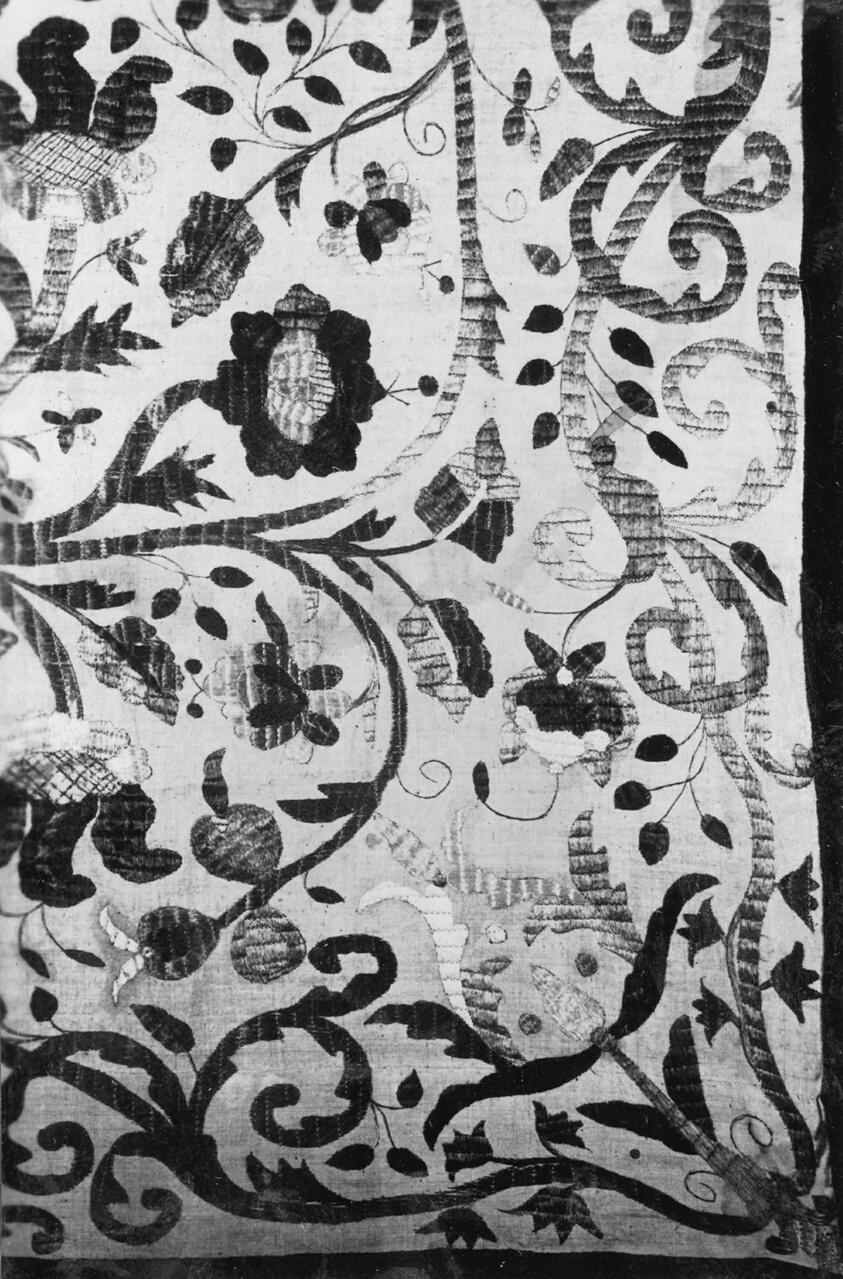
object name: Textile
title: Bedcover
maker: Spain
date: 1775/1825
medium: Linen, plain weave; embroidered in satin and stem stitches; laid work and couching; edged with silk, cut fringe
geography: Spain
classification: textile; needlework (visual works)